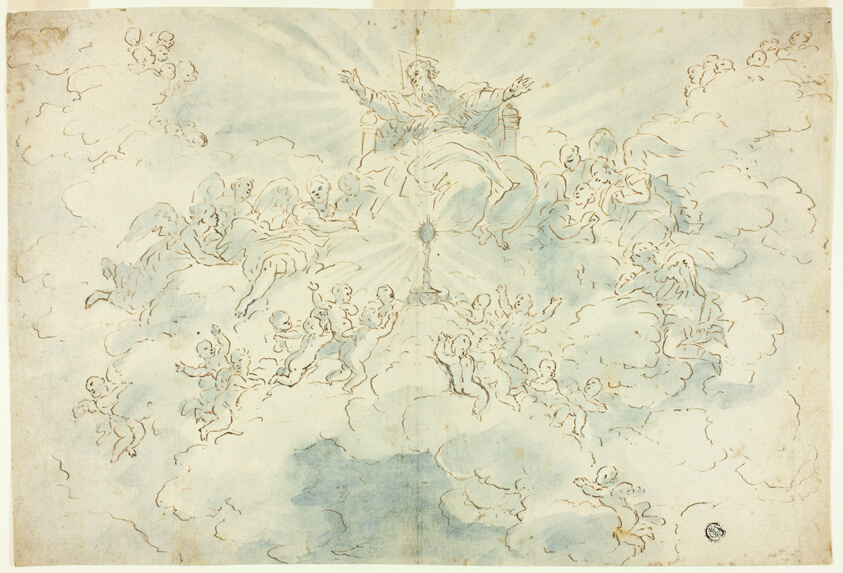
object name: Drawing and Watercolor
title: Adoration of the Host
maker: Attributed to Luigi Garzi (Italian, 1638-1721); or Fidele Fischetti (Italian, 1734-1789); or an uknown Venetian artist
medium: Pen and brown ink, with brush and blue wash, over traces of red chalk, on cream laid paper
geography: Italy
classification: drawings (visual works); prints and drawing